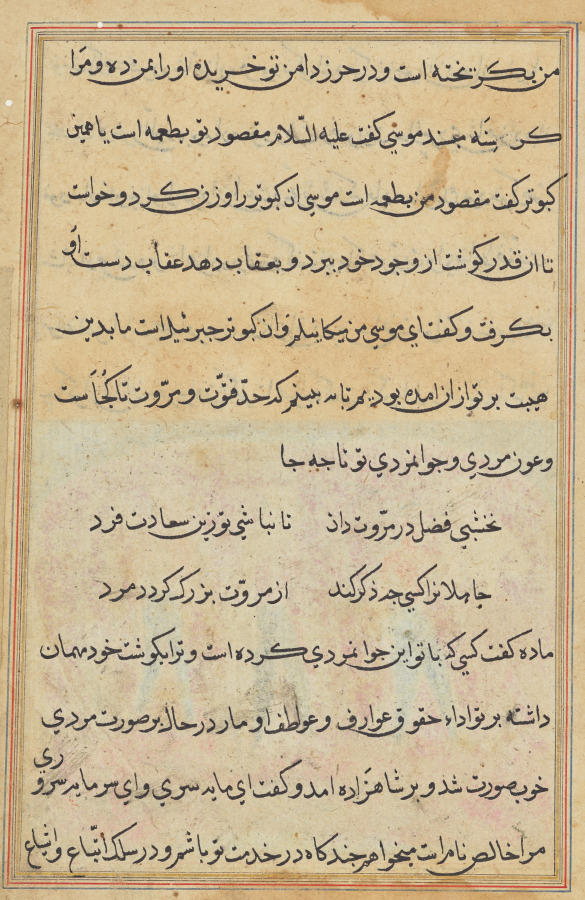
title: Page from Tales of a Parrot (Tuti-nama): text page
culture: Mughal India, court of Akbar (reigned 1556–1605)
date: c. 1560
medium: gum tempera, ink, and gold on paper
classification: Painting